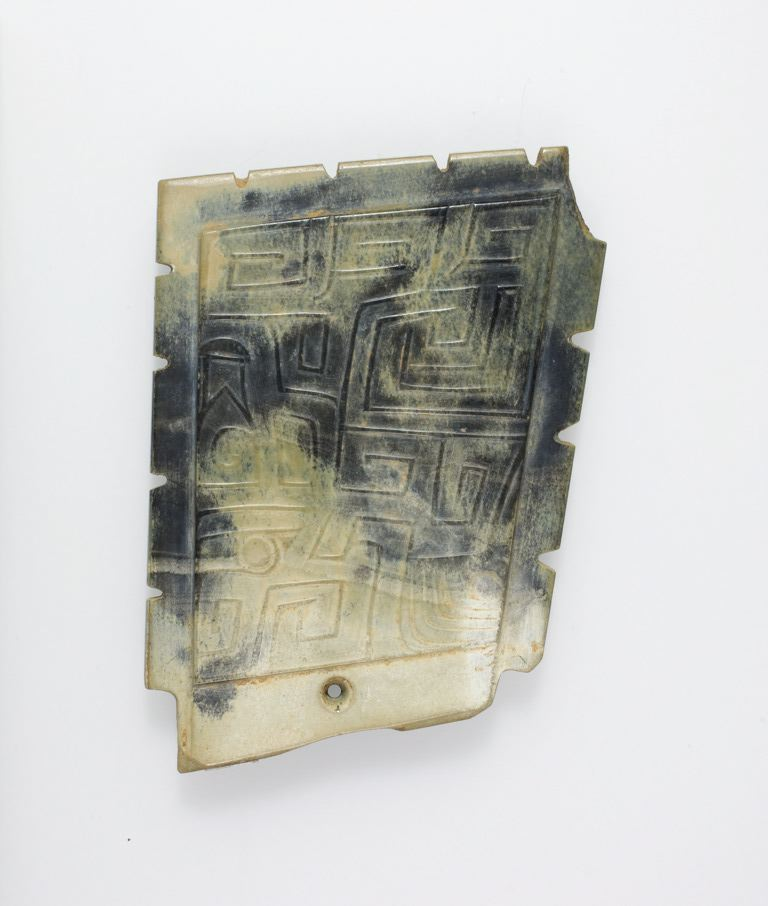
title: Fitting, with double-line incised motif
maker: China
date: Shang dynasty (c. 1600–1050BC)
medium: Jade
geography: China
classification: jade; asian art